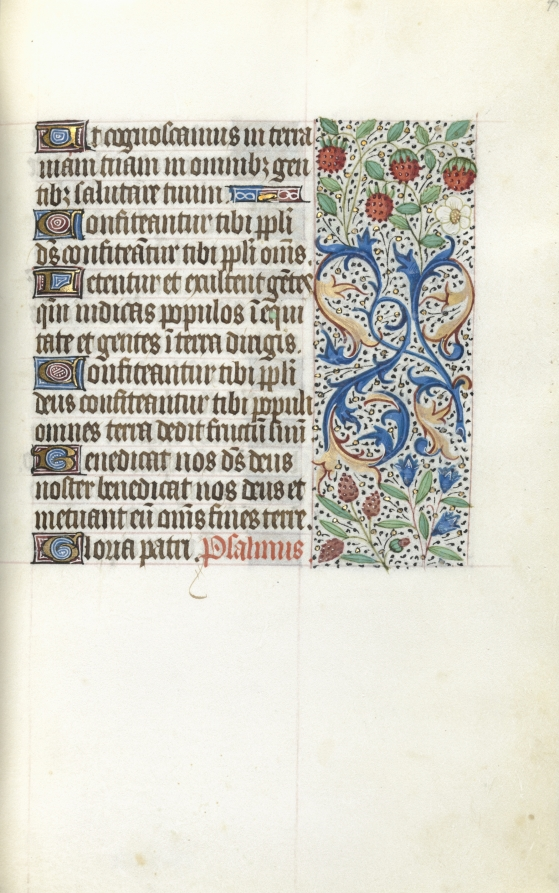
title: Book of Hours (Use of Rouen): fol. 42r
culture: France, Rouen, 15th century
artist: Master of the Geneva Latini (French, active Rouen, 1460–80)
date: c. 1470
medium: ink, tempera, and gold on vellum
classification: Bound Volume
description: In the late 1400s and early 1500s Rouen was an established and important center of book production. The city’s cathedral had a wealthy chapter that spent large sums of money to commission books and to maintain its extensive library. The stationers and booksellers would have likely been concentrated in or near the cathedral precinct. This artist, named after a manuscript now in Geneva, was Rouen’s principal illuminator during the second half of the 1400s.